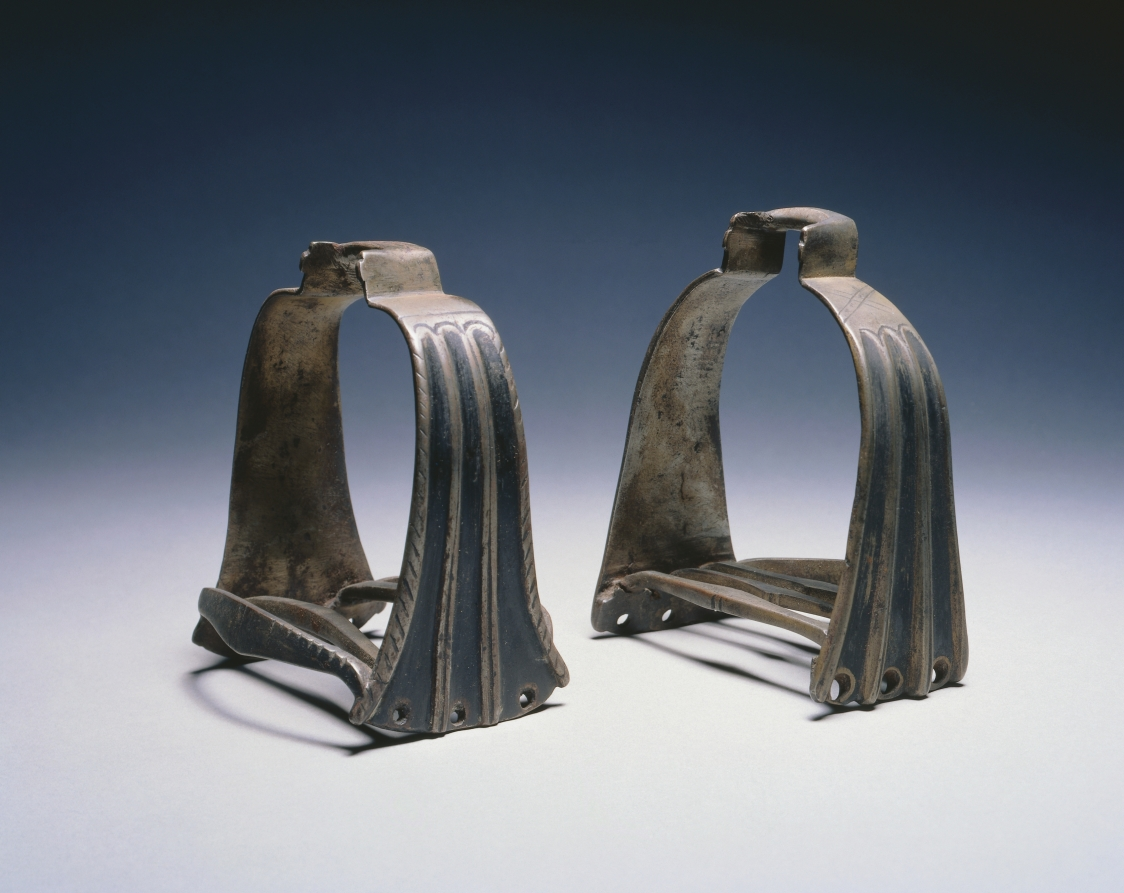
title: Stirrup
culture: Germany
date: c. 1525–1550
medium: steel with modern black paint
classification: Arms and Armor